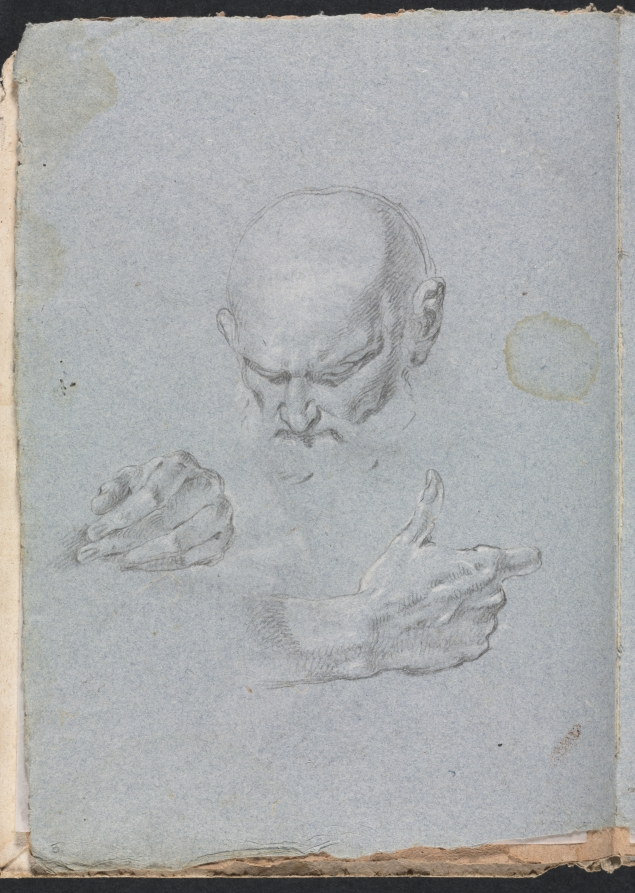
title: Verona Sketchbook: Head of a man with hands (page 8)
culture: Italy, 18th century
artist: Francesco Lorenzi (Italian, 1723–1787)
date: 1760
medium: black chalk with white heightening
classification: Bound Volume